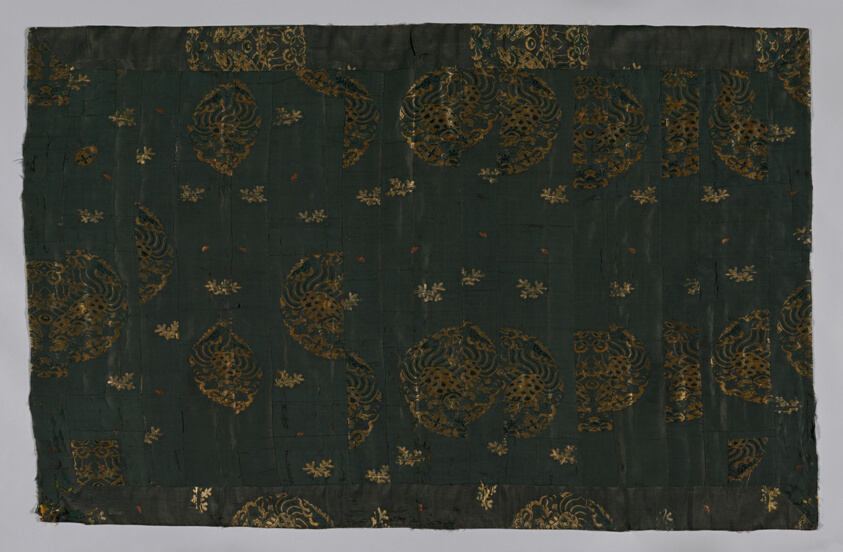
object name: Textile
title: Kesa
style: edo (japanese period)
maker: Japan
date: Edo period (1615–1868), 1711/81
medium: Silk, plain weave with supplementary brocading wefts; lined with silk, warp-float faced 4:1 satin weave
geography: Japan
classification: textile; liturgical - buddhist; weaving